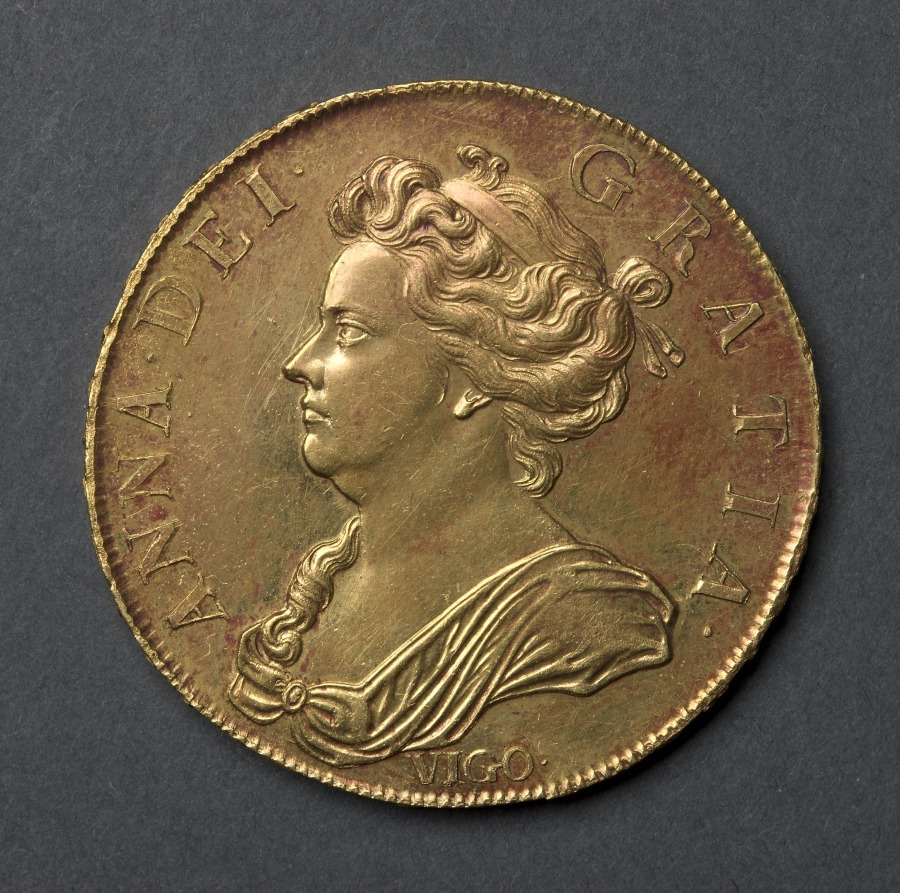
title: Five Guineas: Anne (obverse); Shields and rose (reverse)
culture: England, Anne, 1702-1714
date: 1703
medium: gold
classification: Coins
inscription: ANNA . DEI . GRATIA; below: VIGO.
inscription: MAG BR. FRA ET. HIB REG 1703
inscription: DECUS ET TUTAMEN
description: The coinage during Anne's reign remained fairly constant to the designs inaugurated in 1662. Before the Act of Union with Scotland (1706), the arms of England and Scotland remained separate, as shown. After the act the two arms were conjoined on one shield. The word Vigo denotes that the coins were struck from gold captured from the Spanish at the Battle of Vigo Bay (1702). Although silver coins bearing the Vigo inscription are less rare, the three gold denominations bearing the symbol are all extremely rare.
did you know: Of the five guineas struck for circulation, this type is the rarest.